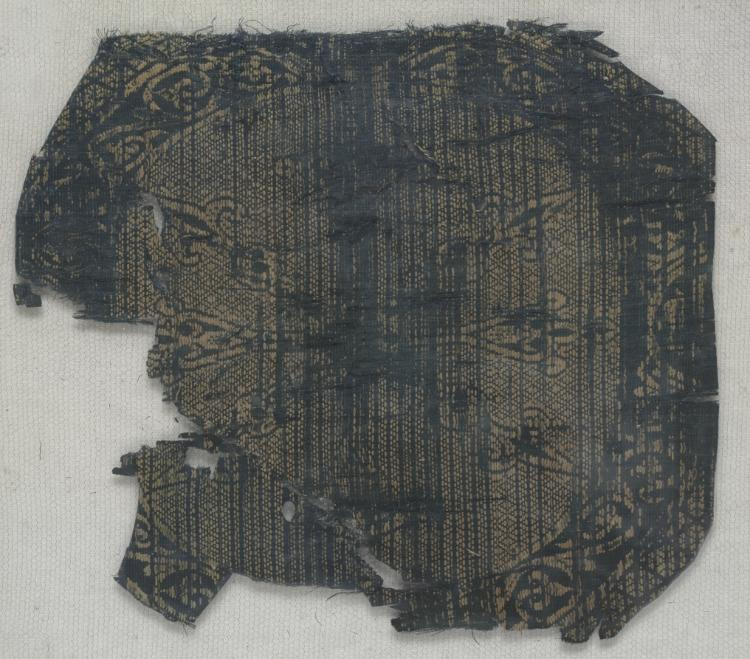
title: Silk Fragment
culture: Syria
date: 900s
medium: silk: plain compound cloth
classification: Textile